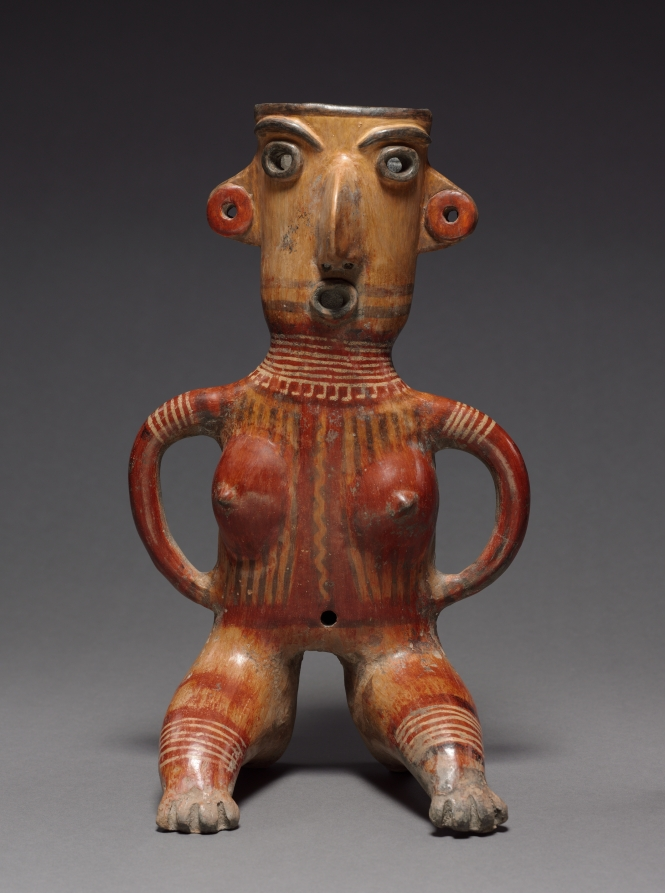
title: Seated Female Figure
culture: Mexico, Jalisco, Zacatecas style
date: 100 BCE–300 CE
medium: pottery with burnished, colored slips, resist patterning, and possibly post-fire painting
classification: Sculpture